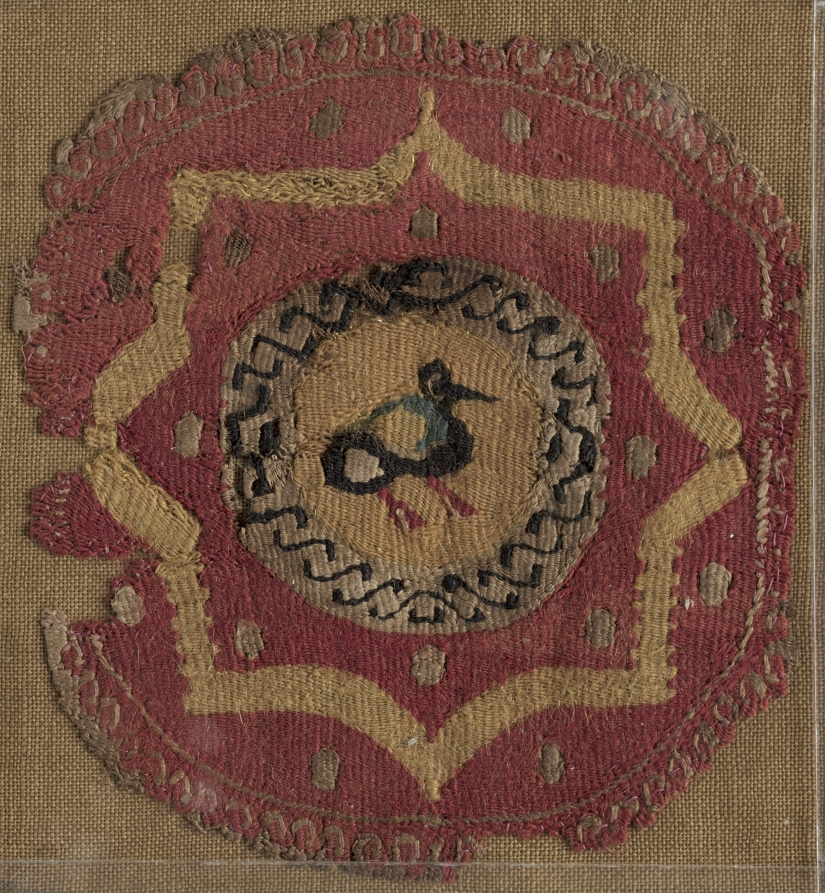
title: Circular Segmentum with Eight-Pointed Star and Bird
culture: Egypt, 7th - 8th century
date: 600s - 700s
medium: tapestry (originally inwoven in tabby ground); linen and wool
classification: Textile